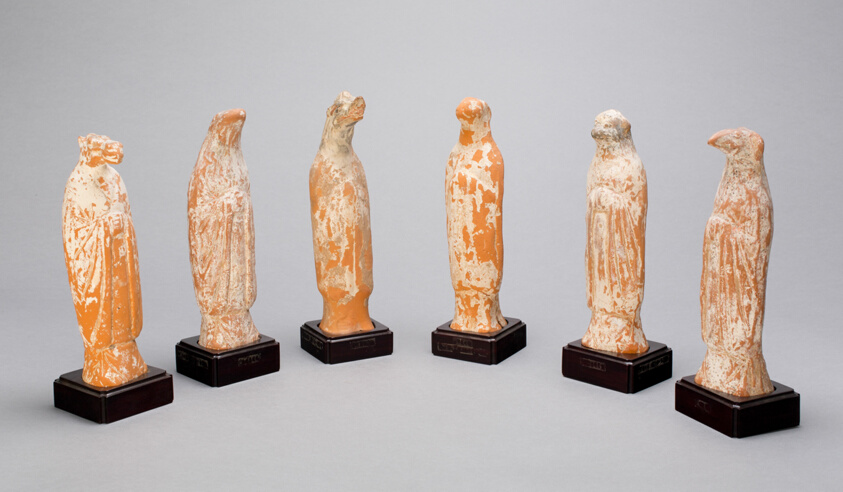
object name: Sculpture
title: Six Zodiac Figures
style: Chinese (culture or style)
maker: China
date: Wei dynasty (386–550)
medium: Earthenware with traces of slip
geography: China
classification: ceramics; asian art; sculpture